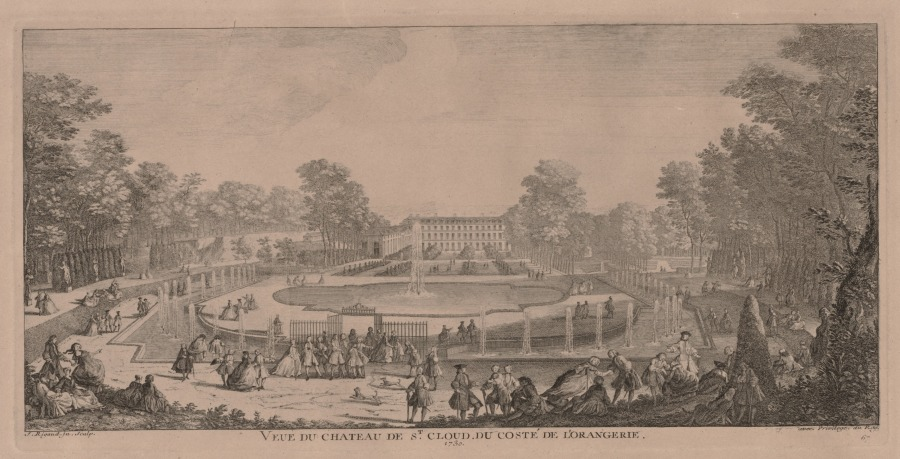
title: Chateau St. Cloud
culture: France, 18th century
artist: Jacques Rigaud (French, 1681–1754)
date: c. 1720–50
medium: engraving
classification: Print